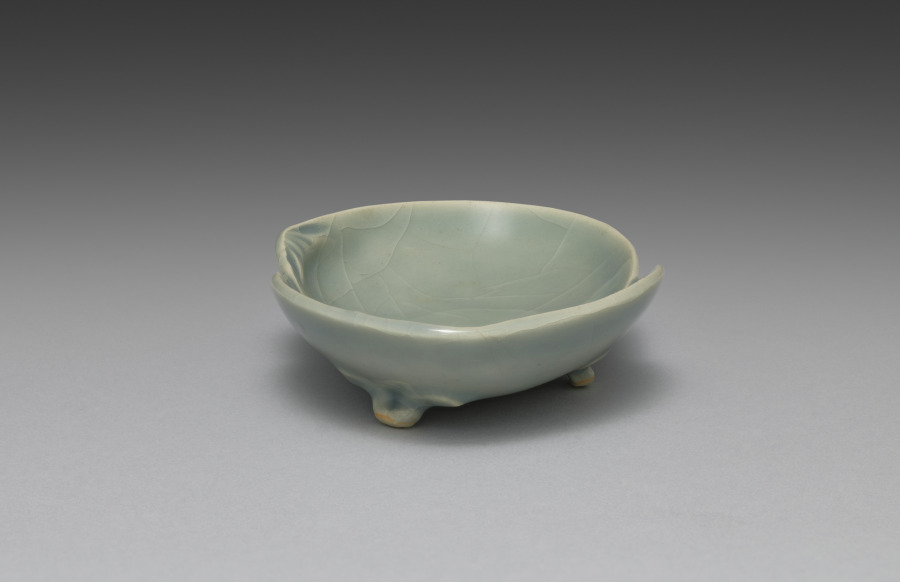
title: Dish from Saucers with Matching Shells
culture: Japan, Meiji period (1868–1912)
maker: Seifū Yohei III (Japanese, 1851–1914)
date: 1893–1914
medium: Porcelain with molded design and green crackled glaze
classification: Ceramic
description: Yohei III’s main output for his sophisticated clientele was in the form of tea sets and dining sets. He created a range of dishes in green glazes. He often produced in pairs, sets of five, or sets of ten. The set of five dishes with a more complex form is described as having a “water-colored glaze” (mizuiroyū). These are shaped like clam half shells, a reference to a game in which shell halves painted with narrative scenes or a variety of motifs must be matched back together by the players. The dishes have molded details to articulate the shell forms, and the crackling across each shell adds another dimension to the surface. Each dish is set on three small feet, formed by a pinched piece of clay and attached to an unglazed area on the underside of the dish. Curiously, while four of the dishes are stamped with the artist’s mark, one has instead a signature carved into the base.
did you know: Each of the paired-shell dishes has its own compartment in a long, flat box.